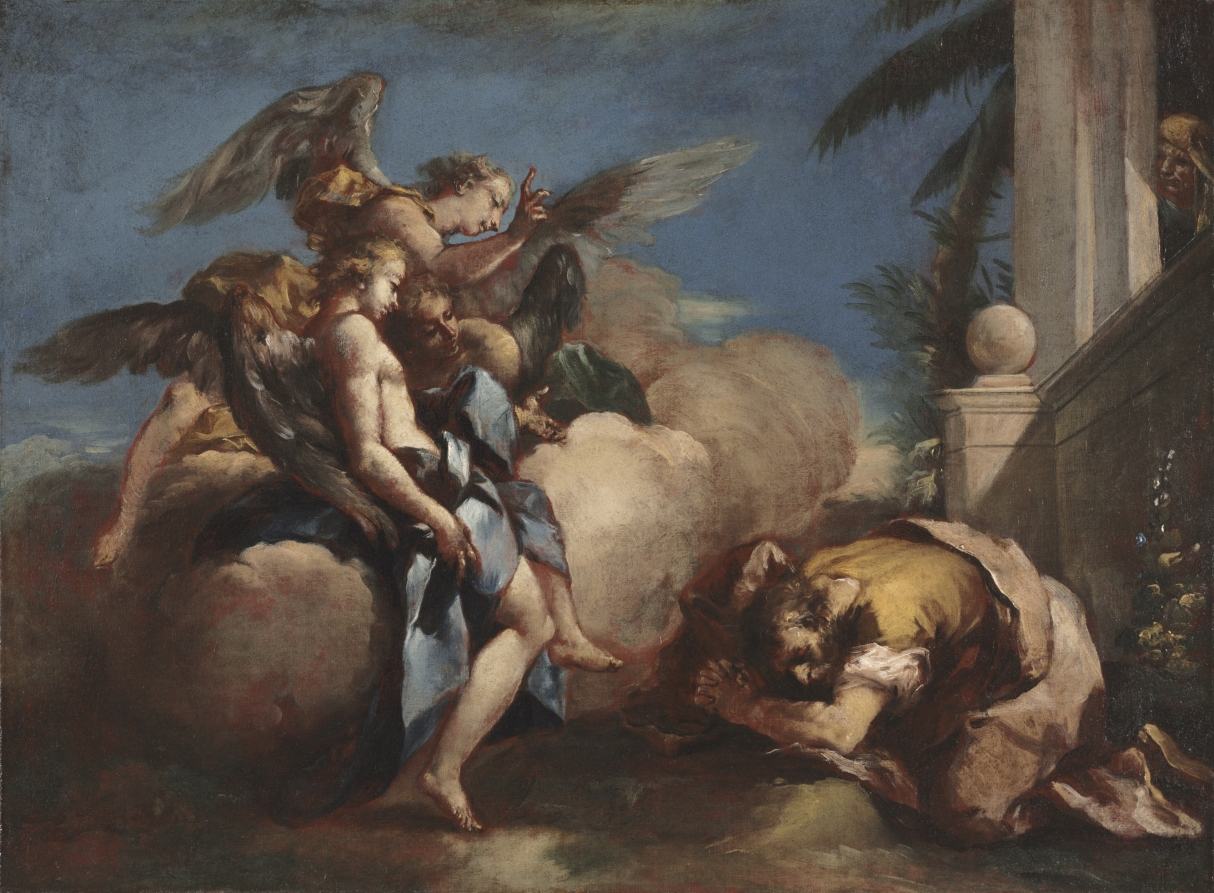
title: The Angels Appearing to Abraham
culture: Italy, 18th century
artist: Francesco Guardi (Italian, 1712–1793)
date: 1750s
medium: oil on canvas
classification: Painting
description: After their initial meeting, Abraham graciously offered to feed the angels and wash their feet. Following the meal, they announce that his wife Sarah, long past child-bearing age, will soon have a son, fulfilling a promise God had made earlier to Abraham. The artist presents the moment of revelation, the angels resplendent in their pastel gowns and feathery wings, with Sarah learning the news while hiding behind their cottage door.